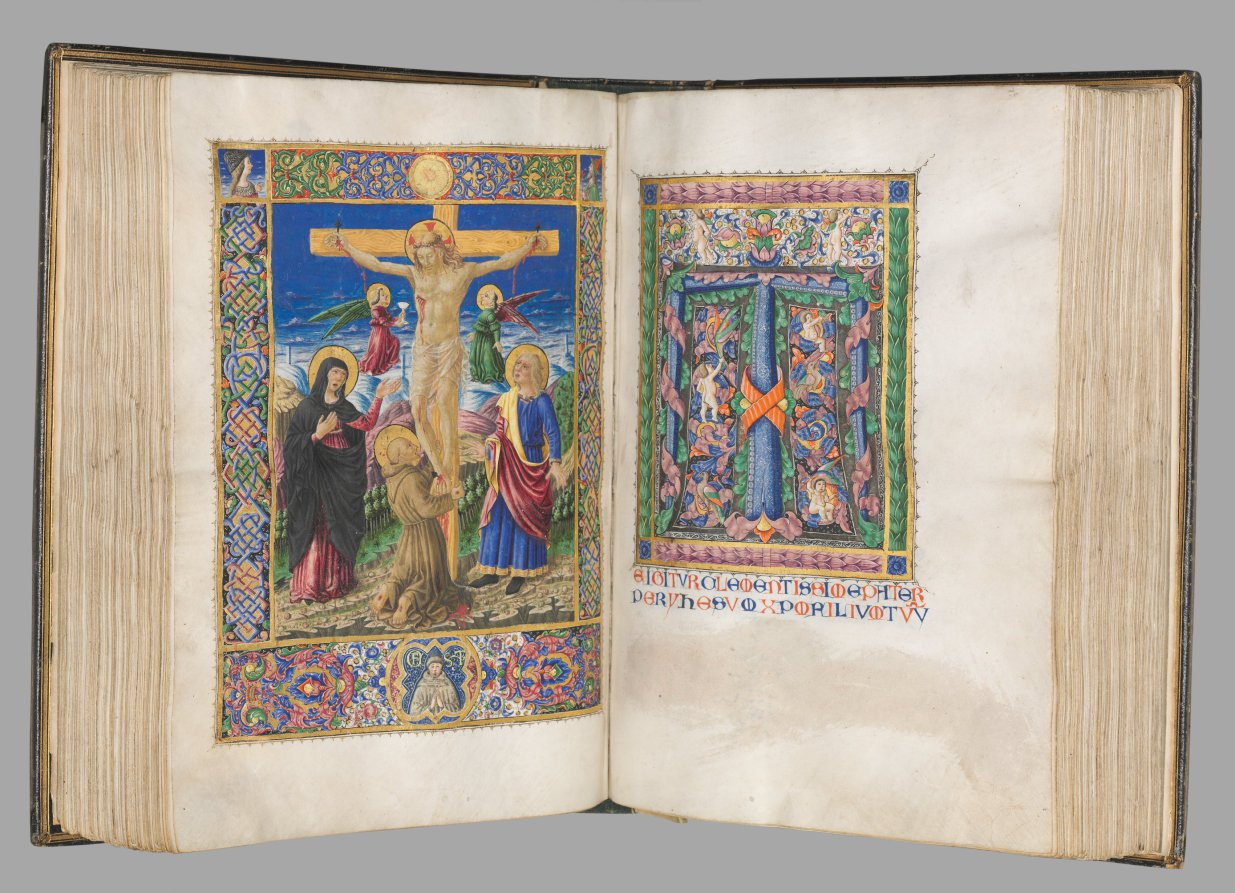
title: Missale: Fol. 185v: Crucifixion with borders (full page)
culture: Italy, Perugia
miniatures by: Bartolommeo Caporali (Italian, c. 1420–1503)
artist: assisted by Giapeco Caporali (Italian, d. 1478)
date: 1469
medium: ink, tempera and burnished gold on vellum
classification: Bound Volume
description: This illuminated manuscript once served as a liturgical service book used on the high altar by a priest for the Mass. The missal’s colophon (inscription) identifies the book as belonging to the church of San Francesco in Montone, a convent of Franciscan friars, and gives its date of completion as October 4, 1469. Here, the volume is opened to its masterpiece, two pages that introduce the canon of the Mass, the most solemn part of the celebration during which the priest consecrates the Eucharistic bread and wine. The missal receives its name from the two Perugian artists who collaborated to illuminate its pages. Here, the Calvary scene featuring the crucified Christ flanked by the Virgin and Saint John is the work of Bartolomeo Caporali, and the marginal decoration and the facing page are likely the work of his brother, Giapeco. Saint Francis’s appearance at the foot of the cross attests to the missal’s Franciscan use and affiliation.